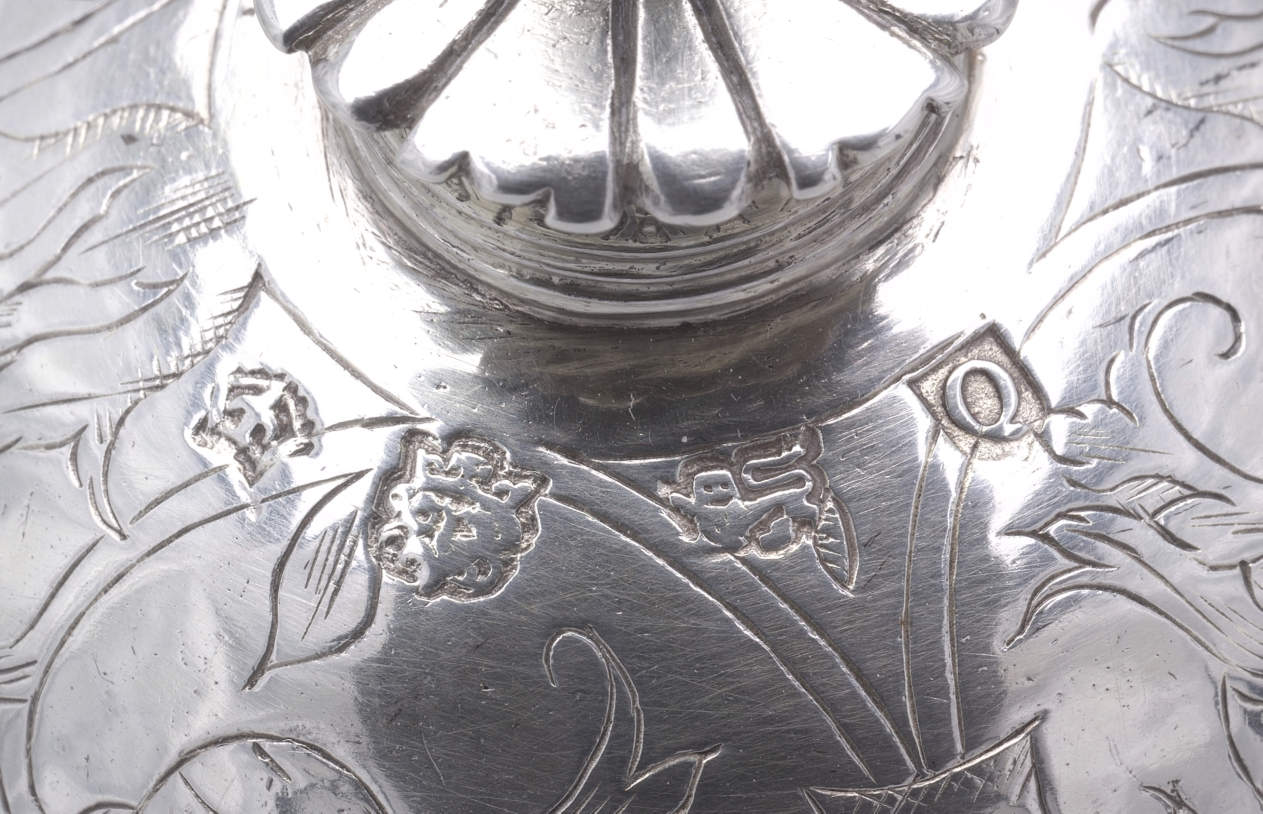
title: Standing Cup and Cover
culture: London, England, late 16th century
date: 1593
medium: silver, partially gilt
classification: Silver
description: Produced during the last years of the Tudor dynasty (1485–1603), this vessel exemplifies the symmetrical patterns, horizontal designs, and clear division of space typical of English silverwork at the time. The functional shape and ornamental designs characteristic of standing cups made them ideal for ceremonial occasions.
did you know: Often made for members of guilds and trade associations in London, standing cups were frequently used during toasts.